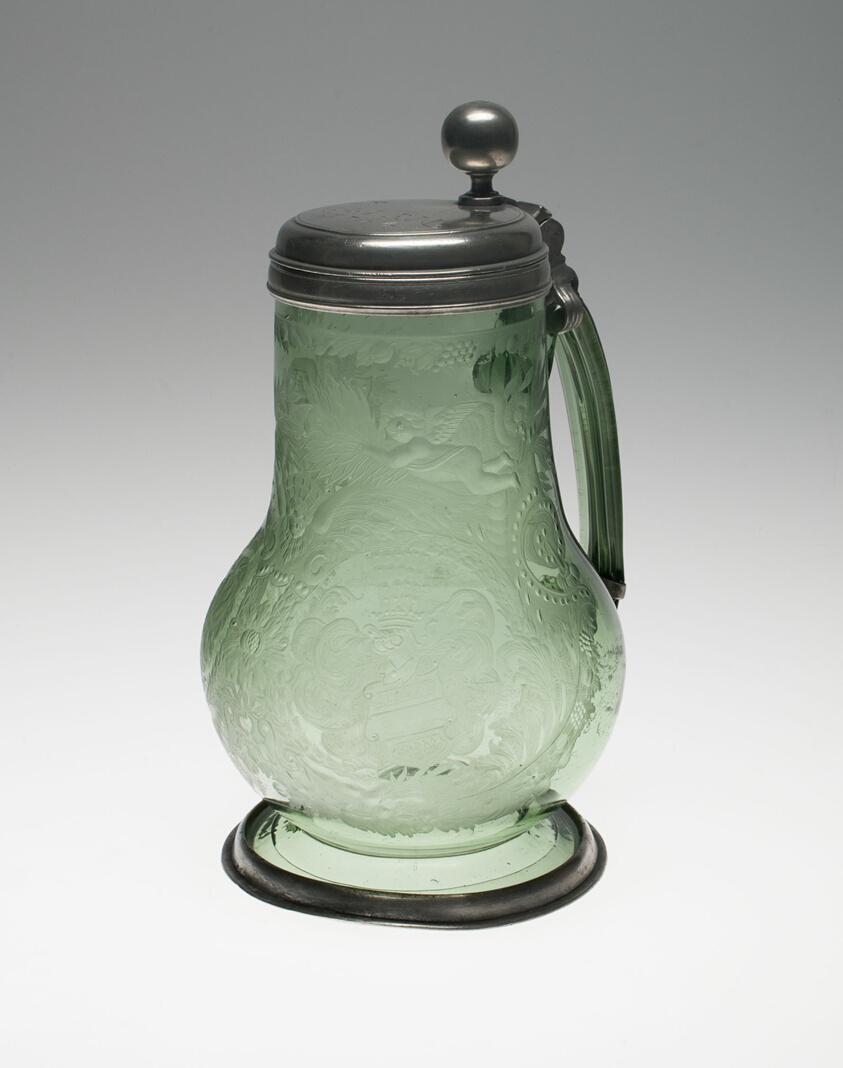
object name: Glass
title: Armorial Covered Tankard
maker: Germany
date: 1714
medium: Glass with pewter mounts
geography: Germany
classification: drinking vessel; glass; european decorative arts